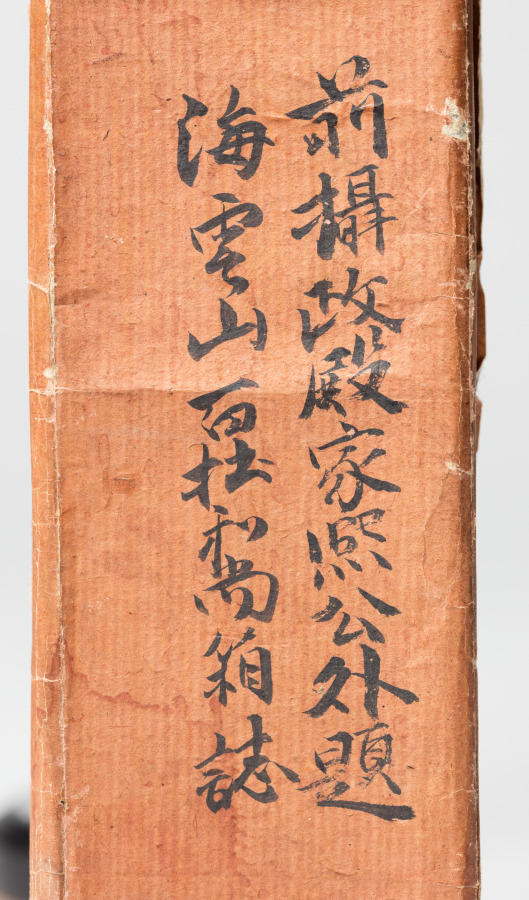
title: Landscape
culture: Japan, Edo period (1615–1868)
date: early 1600s to mid-1800s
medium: hanging scroll; ink on paper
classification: Painting